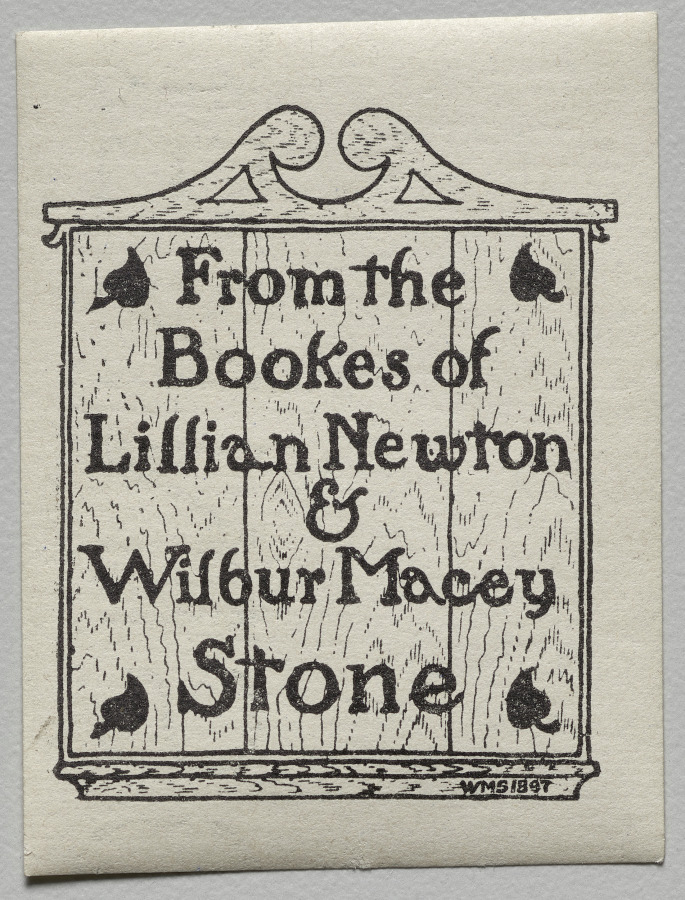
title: Bookplate: Lillian Newton and Wilbur Macey Stone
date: 1897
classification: Print